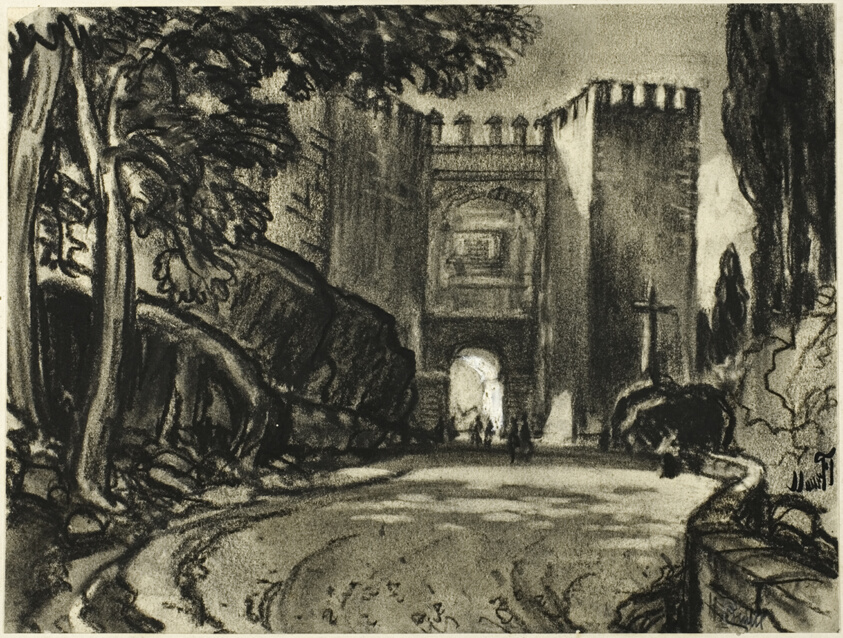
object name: Drawing and Watercolor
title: A Gate of Segovia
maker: Joseph Pennell (American, 1857-1926)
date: c. 1903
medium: Oiled charcoal with stumping and erasing, heightened with touches of white gouache, on cream wove paper, perimeter mounted on off-white wood pulp laminate board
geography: United States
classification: charcoal; drawings (visual works); prints and drawing